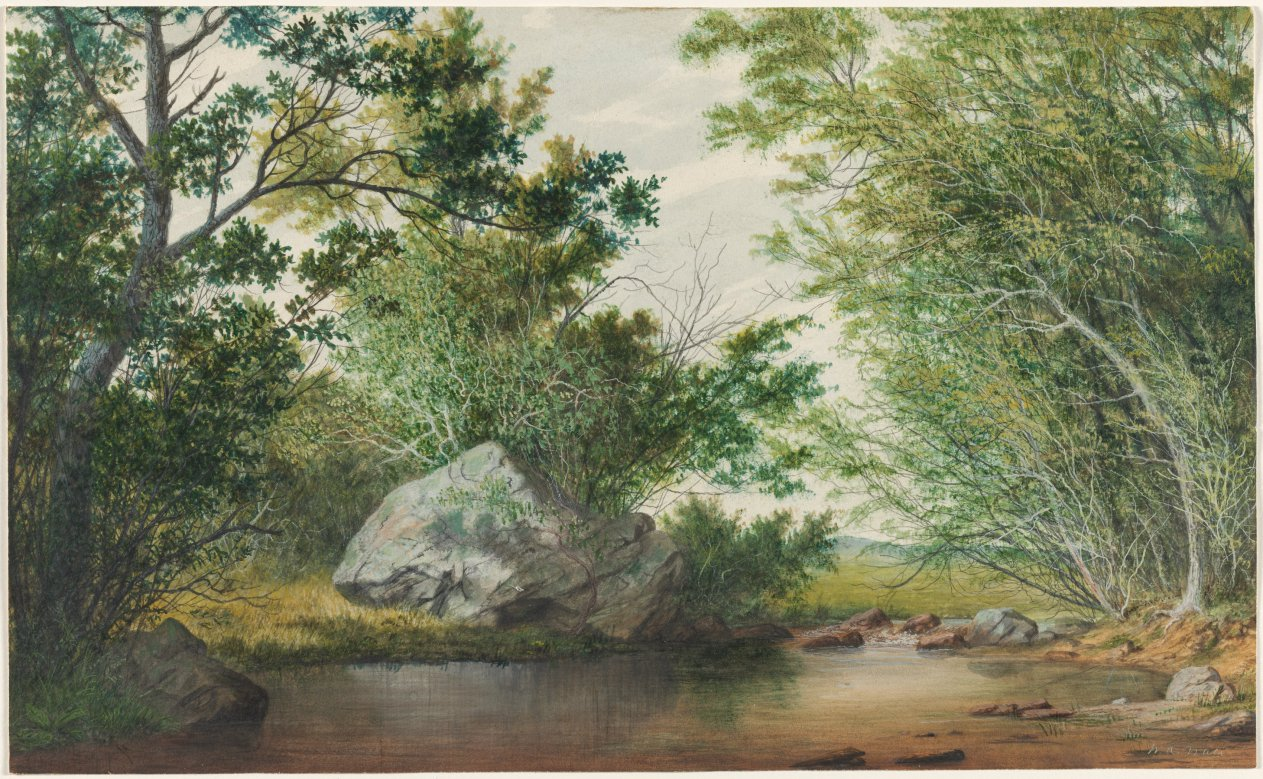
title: Landscape with Wooded Stream and Boulder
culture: America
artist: William Allen Wall (American, 1801–1885)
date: c. 1880s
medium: watercolor and gouache with traces of graphite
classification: Drawing